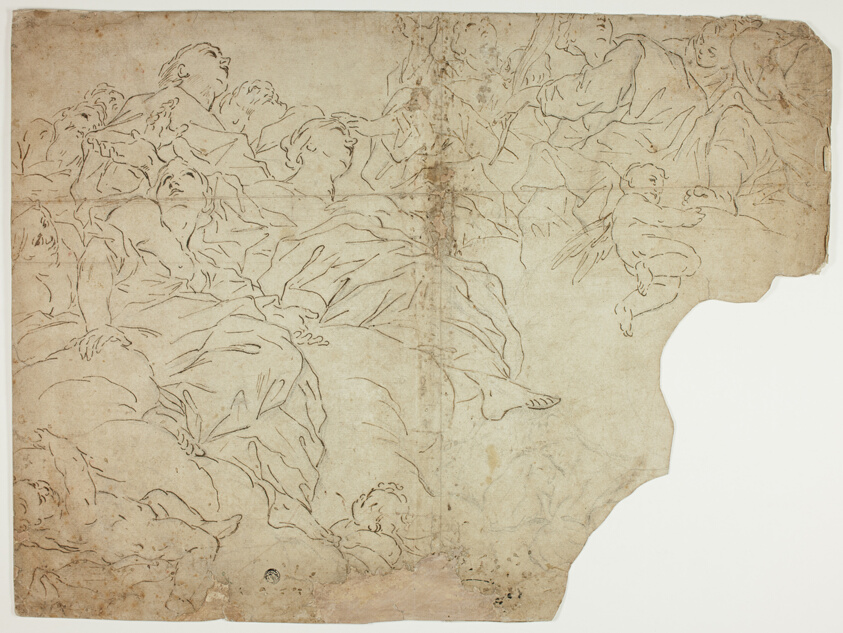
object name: Drawing and Watercolor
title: Saints, or Allegorical Figures and Putti on Clouds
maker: Attributed to Giovanni Battista Beinaschi (Italian, 1636-1688); or Antonio Allegri, called Correggio (Italian, c. 1489-1534)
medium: Pen and brown ink, with charcoal, on buff laid paper, laid down on cream laid paper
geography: Italy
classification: pen and ink drawings; drawings (visual works); prints and drawing